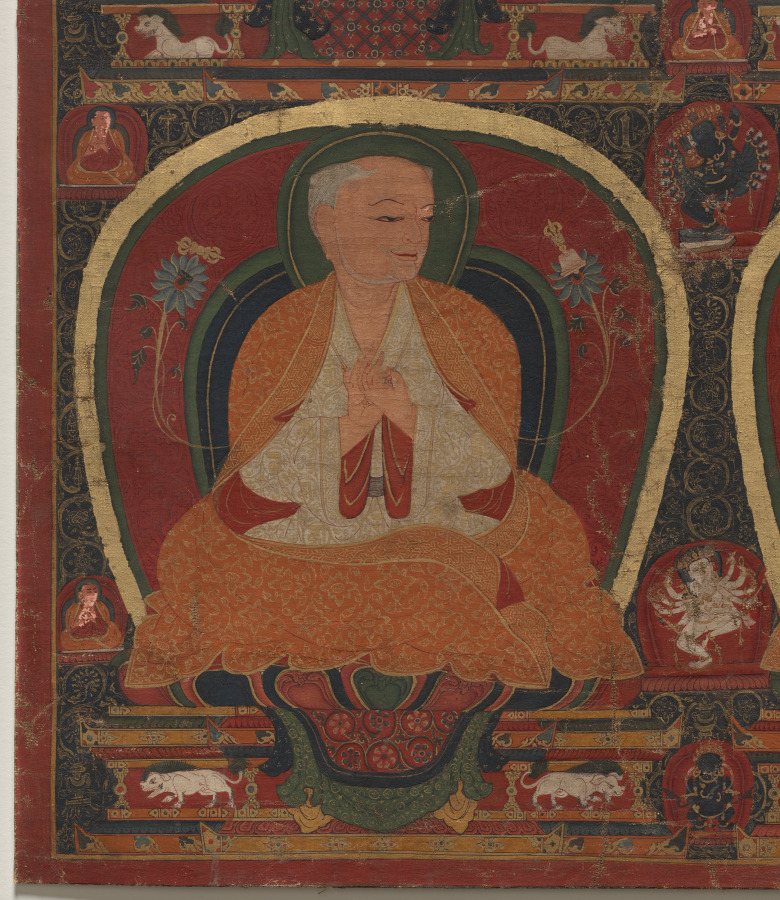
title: Four seated Masters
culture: Central Tibet, Ngor monastery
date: c. 1450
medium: Gum tempera and gold on cotton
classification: Painting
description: Founders and prominent masters of the Sakya order of Buddhism in Tibet are featured in this painting as part of the lineage of teachers who transmitted knowledge of their fundamental text, the Hevajra Tantra. It is part of a series of paintings made at one of the main Sakya monastic centers, which had close ties with Nepal. This Tibetan artwork includes Nepalese features, such as the delicate, decorative quality of the painting, its two-dimensionality, the exaggerated curvature of the upper eyelid, and the filling of all spaces with scrollwork.